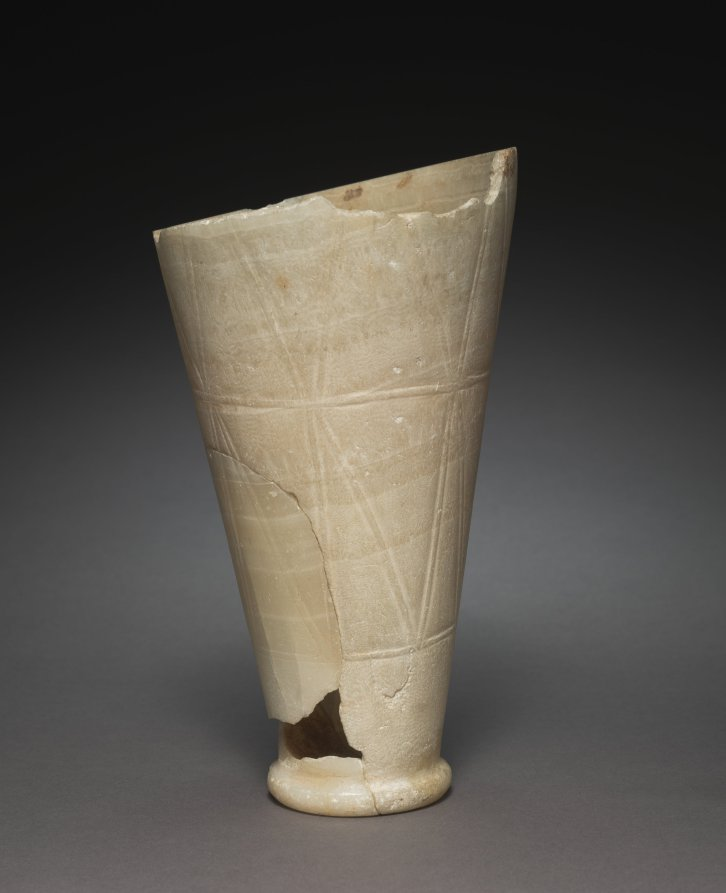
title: Tall Jar with Rope Patterns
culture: Egypt, Saqqara, north of the Step Pyramid, tomb 2305, excavations of J. E. Quibell, 1910-1911, Old Kingdom (2647–2124 BCE), Dynasty 3, reign of Djoser (c. 2650 BCE)–reign of Sneferu (2613–2589 BCE)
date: 2647–2454 BCE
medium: travertine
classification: Vessels